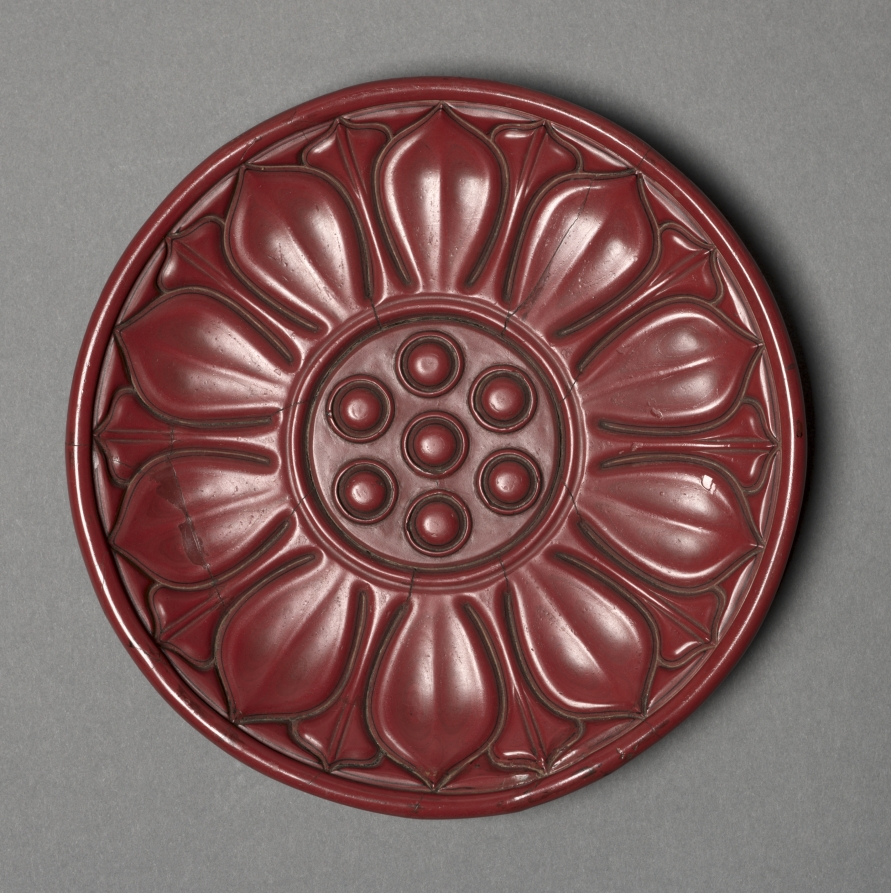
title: Lotus Dish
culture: China, Yuan dynasty (1271-1368)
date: 1271–1368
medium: Carved cinnabar-red lacquer on wood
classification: Lacquer